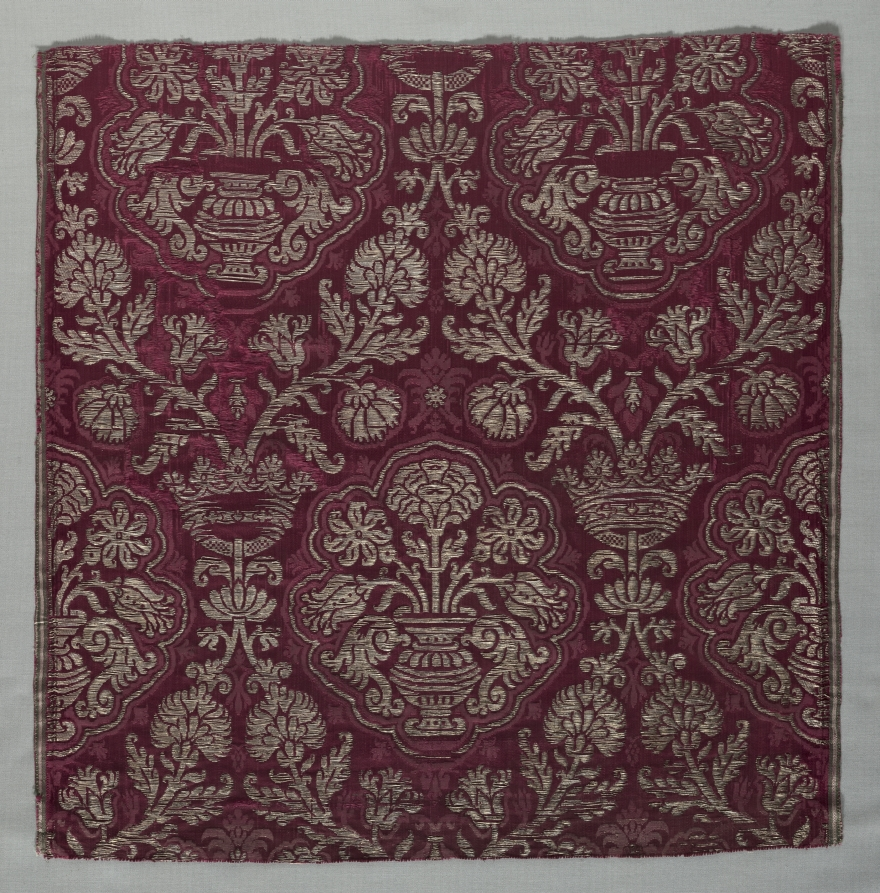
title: Silk Fragment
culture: Italy, 16th century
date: 1500s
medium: brocaded satin, silk, and gold filé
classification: Textile